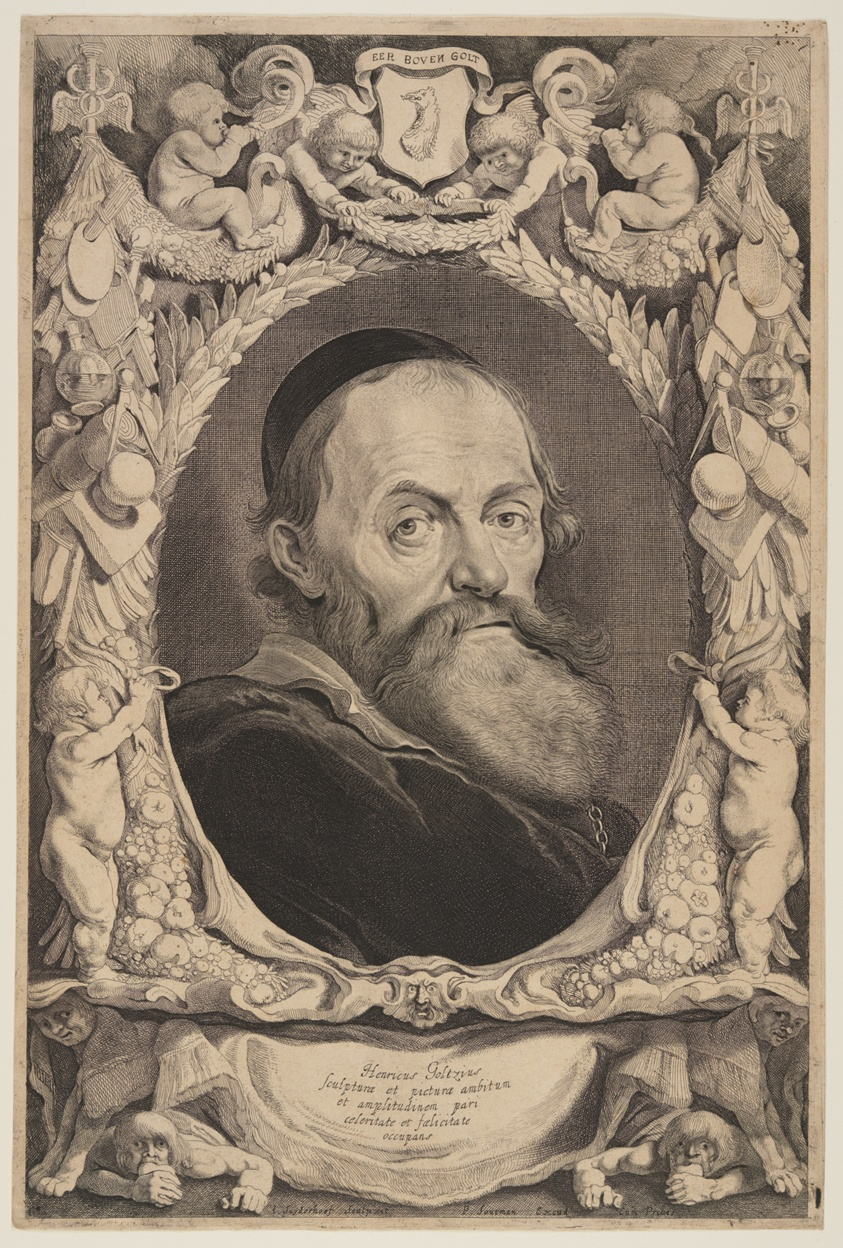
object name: Print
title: Hendrick Goltzius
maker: Jonas Suyderhoef (Dutch, c. 1613–1686)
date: c. 1649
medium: Etching and engraving on ivory laid paper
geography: Netherlands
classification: etching; paper; print; prints and drawing